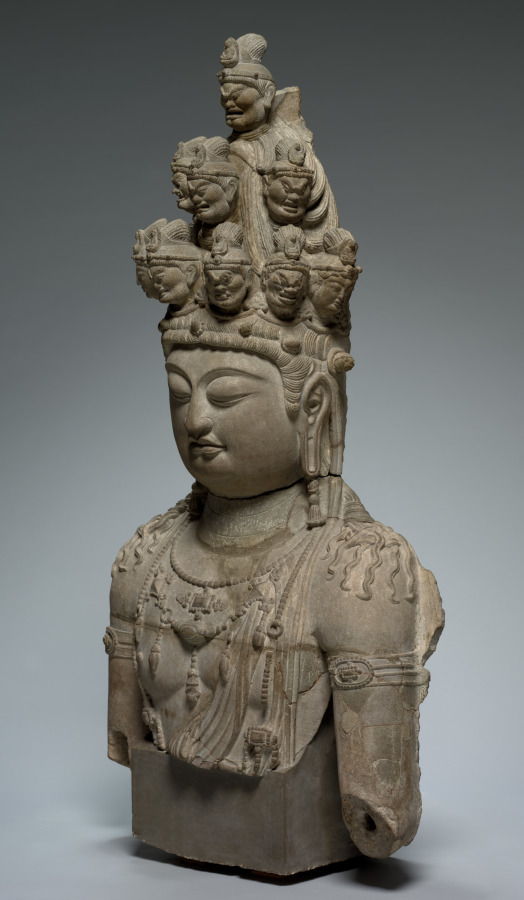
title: Eleven-Headed Guanyin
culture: China, Tang dynasty (618-907)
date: early 700s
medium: gray sandstone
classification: Sculpture